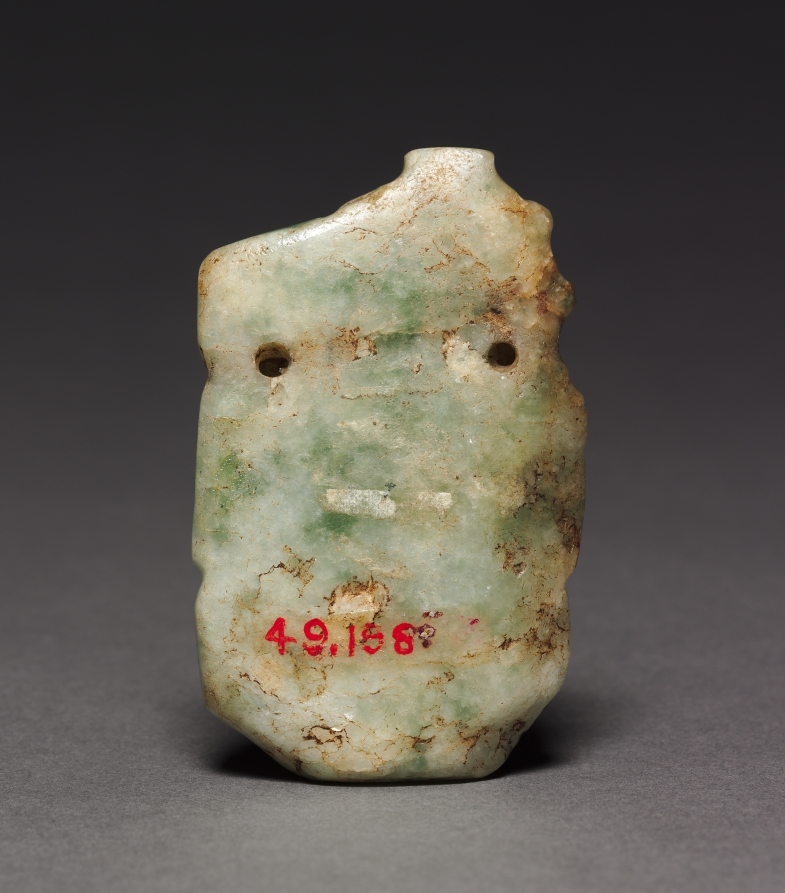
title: Pendant with Scribe Figure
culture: Mexico, Mixtec?, 8th-11th Century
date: c. 700–1000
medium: jade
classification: Jade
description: The seated figure's high status is indicated by an elaborate headdress and jewelry, including earplugs, a necklace, and bracelets. Iin his right hand is a brush, perhaps for painting a book or mural.